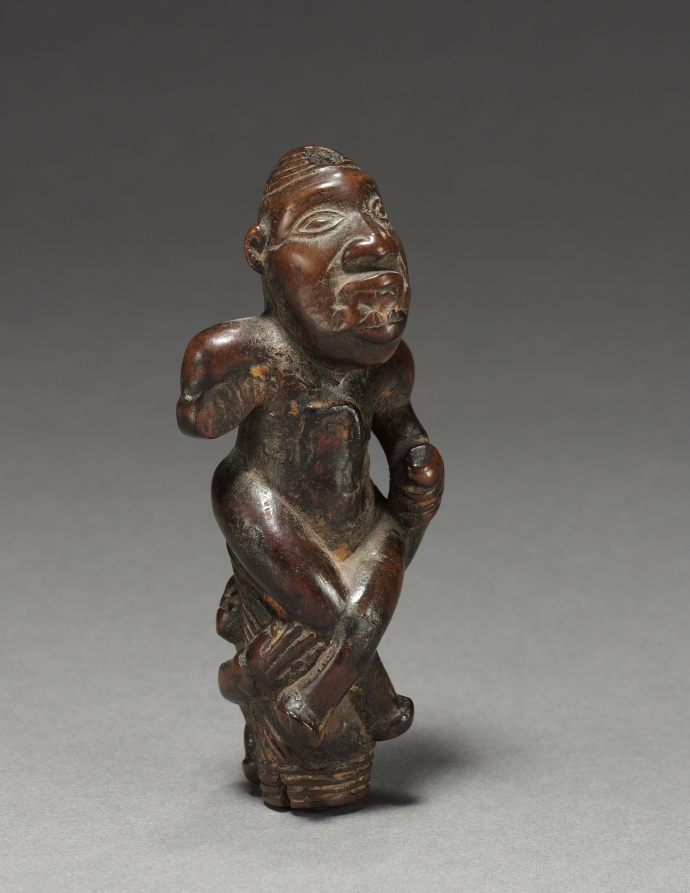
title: Male Figurine or Finial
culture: Central Africa, Democratic Republic of the Congo (most likely), Cabinda, or Republic of the Congo, probably Yombe people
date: early 1800s-early 1900s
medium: Wood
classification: Sculpture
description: This figurine or finial may have contained a medicine-filled package on its abdomen. The man seated with his legs crossed and wearing a coiffure of Portuguese inspiration may represent a chief, which was once attached to a scepter or perhaps a flywhisk. Beneath the chief, a child holds onto his back; though such imagery is more typically seen with female sculptures.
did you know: The stomach cavity was once filled with medicinal substances; once removed, the nkisi figure is considered “decommissioned.”